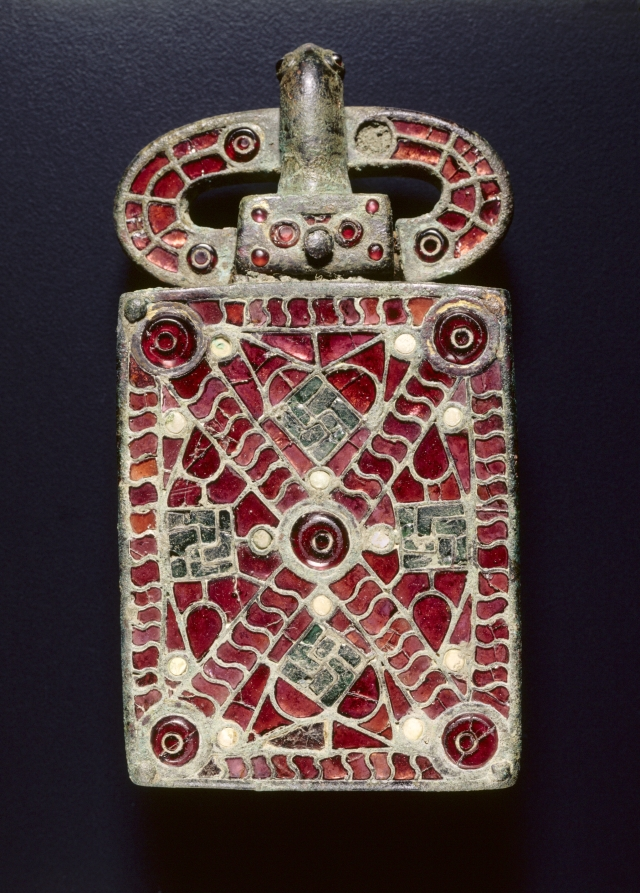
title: Belt Buckle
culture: Visigothic, Spain, Migration Period, 6th century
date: c. 525–560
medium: bronze with garnets, glass, mother of pearl, gold foil, traces of gilding; bronze and glass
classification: Jewelry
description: The art of the European Migration Period (3rd-7th centuries AD) is almost exclusively one of personal adornment-a portable art that followed men and women to their graves. Belt buckles with large rectangular attachment plates have been discovered in cemeteries across the Iberian Peninsula-now occupied by Spain and Portugal-from the period of Visigothic occupation (about AD 412-711). Their decoration varies. Finer examples, like this one, are distinguished by brilliantly inlaid semi-precious stones and colored glass. Garnets were especially prized in Visigothic society for use in cloisonné jewelry. The technique involved the fitting of carefully cut pieces of polished garnet into an intricate grid of compartments, or cloisons. This buckle is so densely inlaid with garnets that it presents a virtual "carpet" of red to the eye. These large Visigothic buckles are strikingly uniform in shape yet endlessly varied in surface design, perhaps a sign that they expressed the personal identities of their original owners. Grave excavations have shown that belt buckles of this type were made for women.